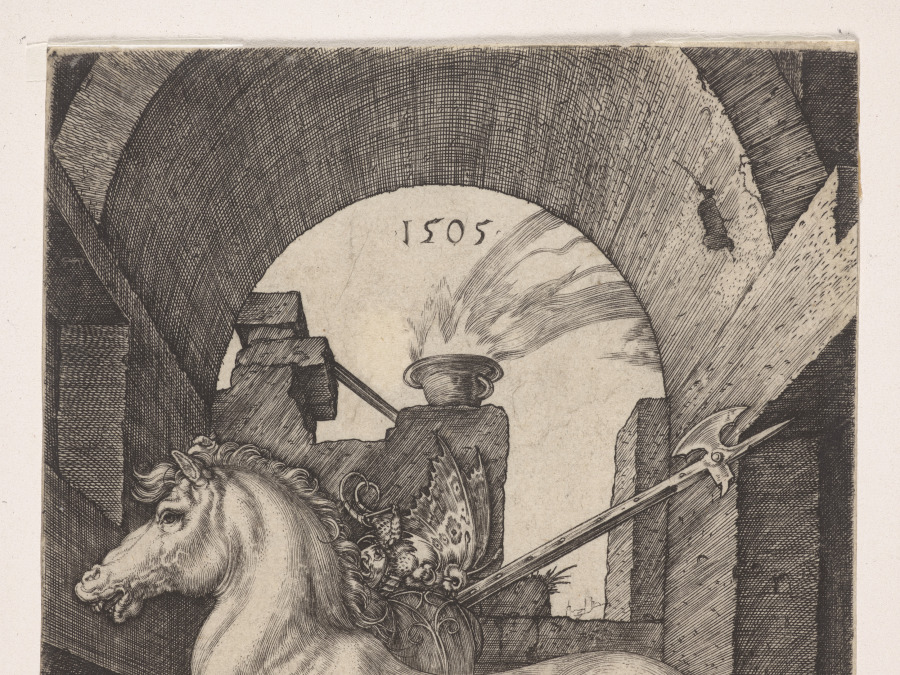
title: The Small Horse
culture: Germany, early 16th Century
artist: Albrecht Dürer (German, 1471–1528)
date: 1505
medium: engraving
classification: Print